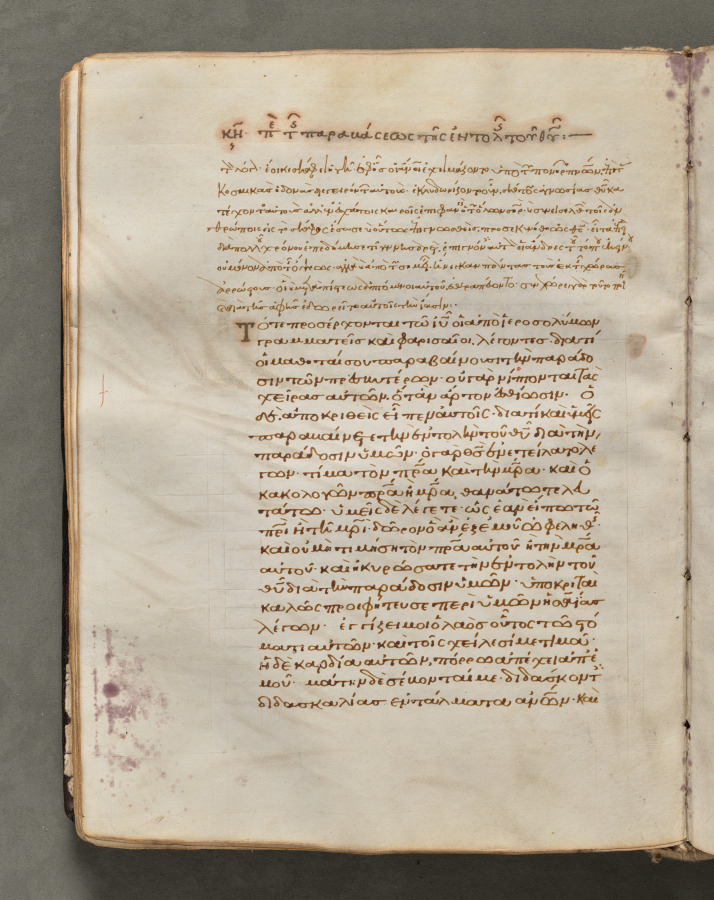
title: Text, folio 67 (verso), from a Gospel Book with Commentaries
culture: Byzantium, Constantinople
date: c. 1000–1100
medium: ink, tempera, and gold on vellum; leather binding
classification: Bound Volume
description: Each of the four gospels in this book opens on a page with brilliantly illuminated borders depicting the author of the text as well as birds-principally peacocks, symbols of the immortality of the soul-and fountains, representing the fountain of life and the salvation of the soul. This volume consists of 428 leaves with texts in Greek. Its level of sophistication suggests that it was probably written and decorated in a monastery in Constantinople.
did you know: Gospel Books were carried in procession through Byzantine churches.